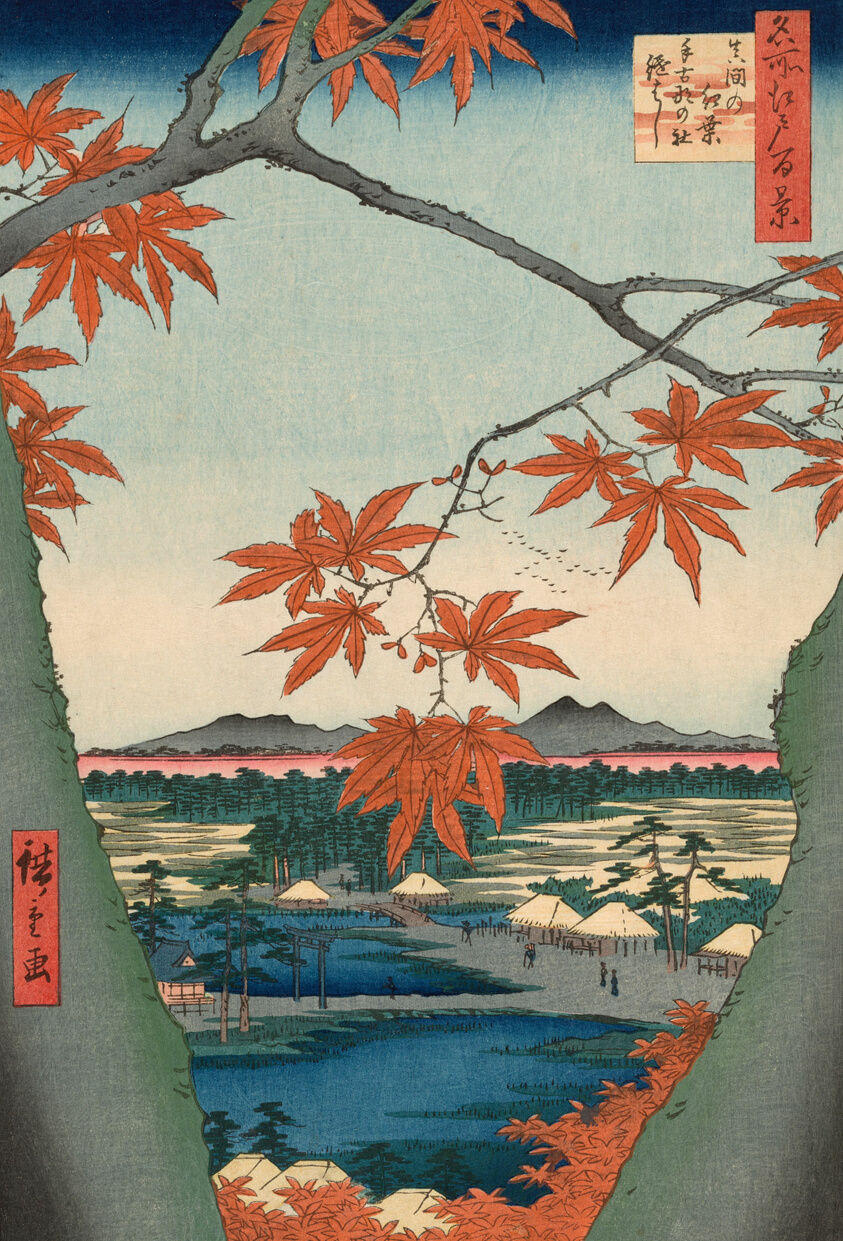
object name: Print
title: Maple Trees at Mama, Tekona Shrine and Tsugi Bridge (Mama no momiji, Tekona no yashiro, Tsugihashi), from the series "One Hundred Famous Views of Edo (Meisho Edo hyakkei)"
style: Japanese (culture or style)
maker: Utagawa Hiroshige 歌川 広重; Japanese, 1797-1858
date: 1857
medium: Color woodblock print; oban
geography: Japan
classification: woodblock print; print; asian art